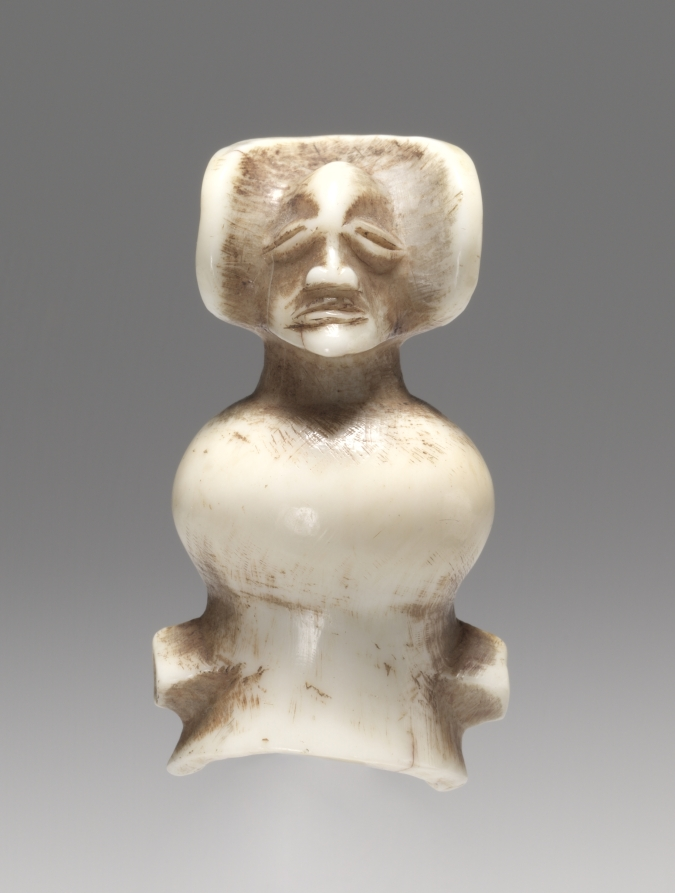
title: Whistle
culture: Africa, Central Africa, Democratic Republic of the Congo or Angola, Chokwe-style maker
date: late 1800s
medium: Probably hippopotamus ivory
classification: Musical Instrument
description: Carved out of ivory or wood in a variety of shapes, Chokwe whistles often bear miniature, stylized renderings of masks. Cikunza, the "patron saint" of the boys' initiation into manhood, is depicted with a pointed extension imitating the horn of a road antelope, symbolizing the fertility spirit. Typically such whistles were used by men during the hunt to communicate with their co-hunters and to call their dogs. They were either worn attached to a string as a necklace or tied to a spear.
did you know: This whistle is the first piece from sub-Saharan Africa acquired by the CMA.